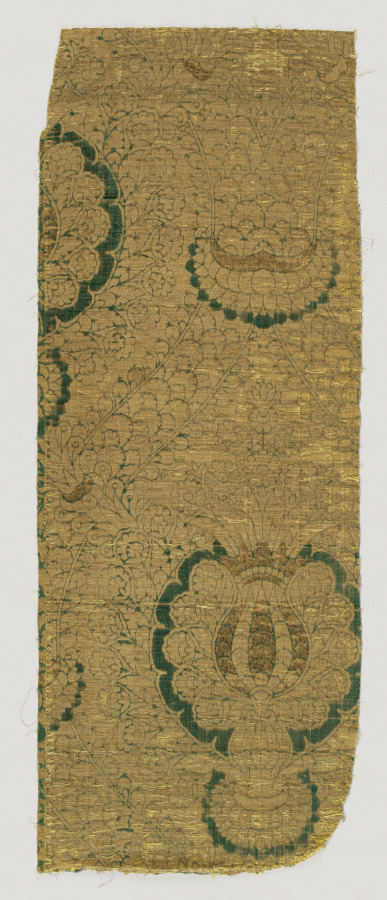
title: Velvet Fragments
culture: Spain, early 16th century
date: early 16th century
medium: velvet (cut, voided, and brocaded): silk and gold thread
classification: Velvet